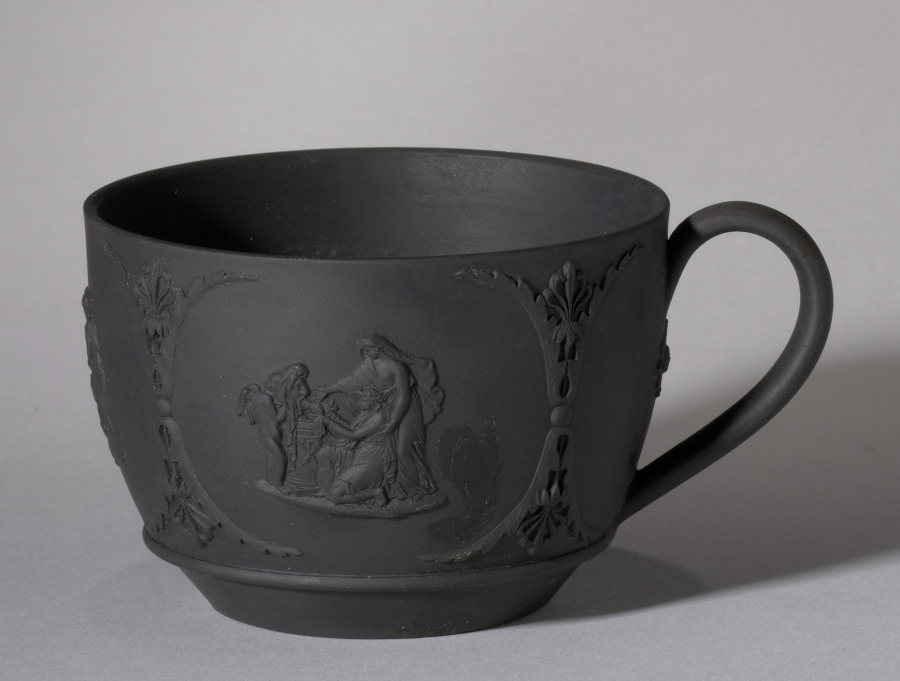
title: Cup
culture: England, Staffordshire, 19th century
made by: Wedgwood Factory (British)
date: 1800s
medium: black basalt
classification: Ceramic